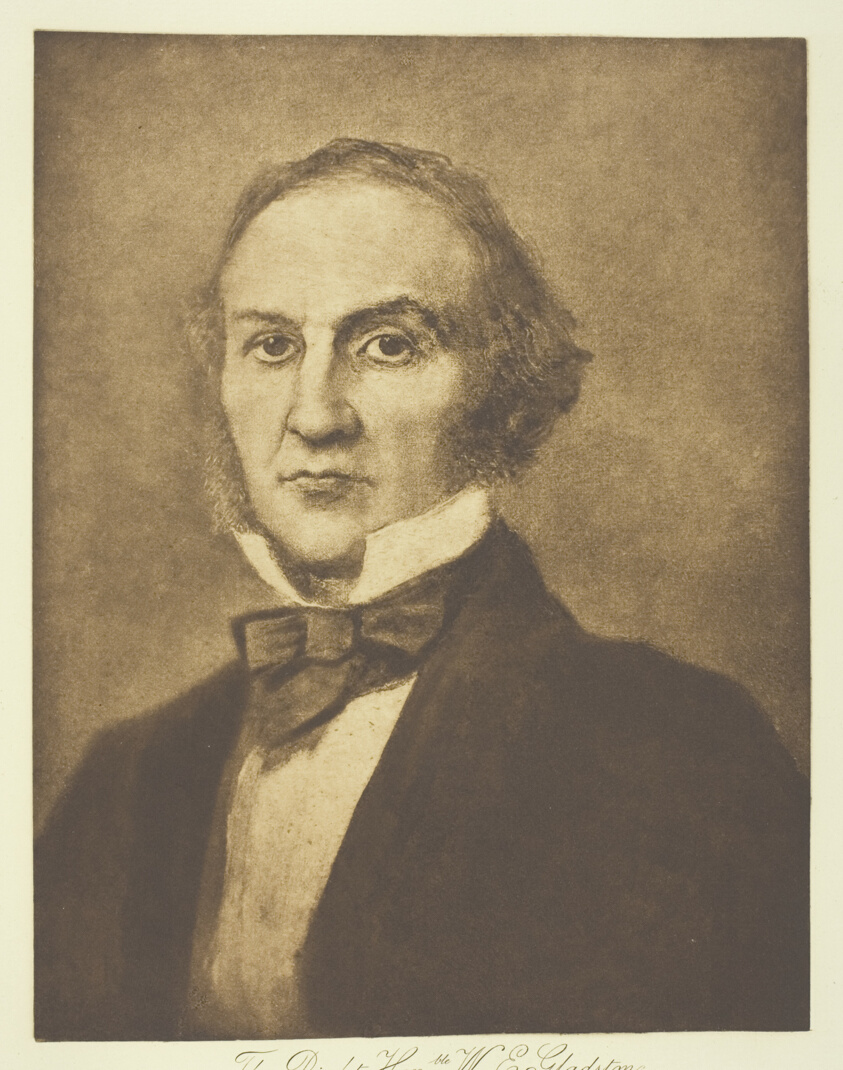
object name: Photograph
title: The Right Honourable W.E. Gladstone, M.P.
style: 19th century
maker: Henry Herschel Hay Cameron (English, 1852–1911); after George Frederick Watts (English, 1817–1904)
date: c. 1893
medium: Photogravure, plate 10 from the album "Lord Tennyson and his Friends" (1893)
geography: England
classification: photogravure; photomechanical process; photography; photograph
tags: Collected by Hugh Edwards, Lord Tennyson and His Friends